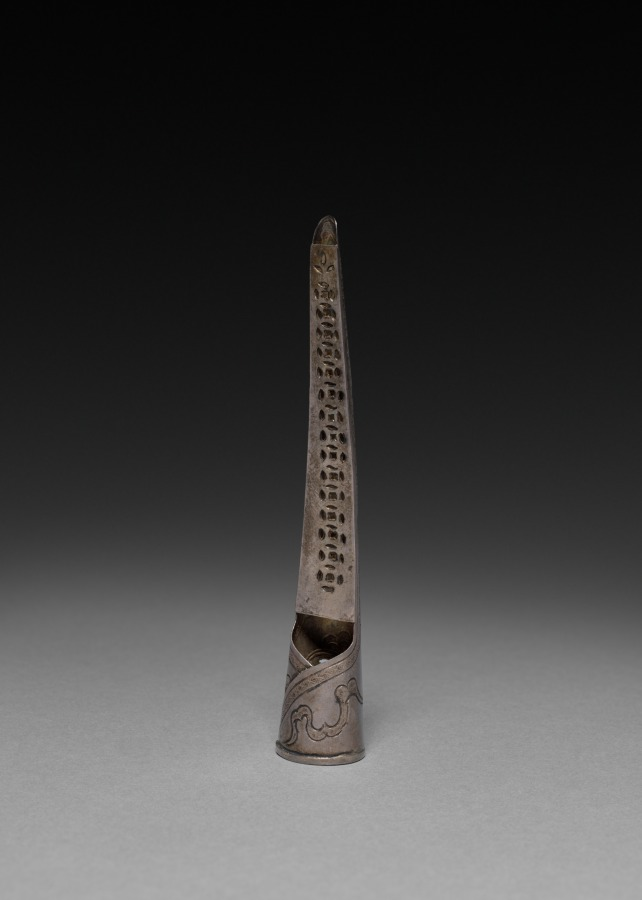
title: Fingernail Protector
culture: China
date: early 1900s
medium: metal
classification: Jewelry